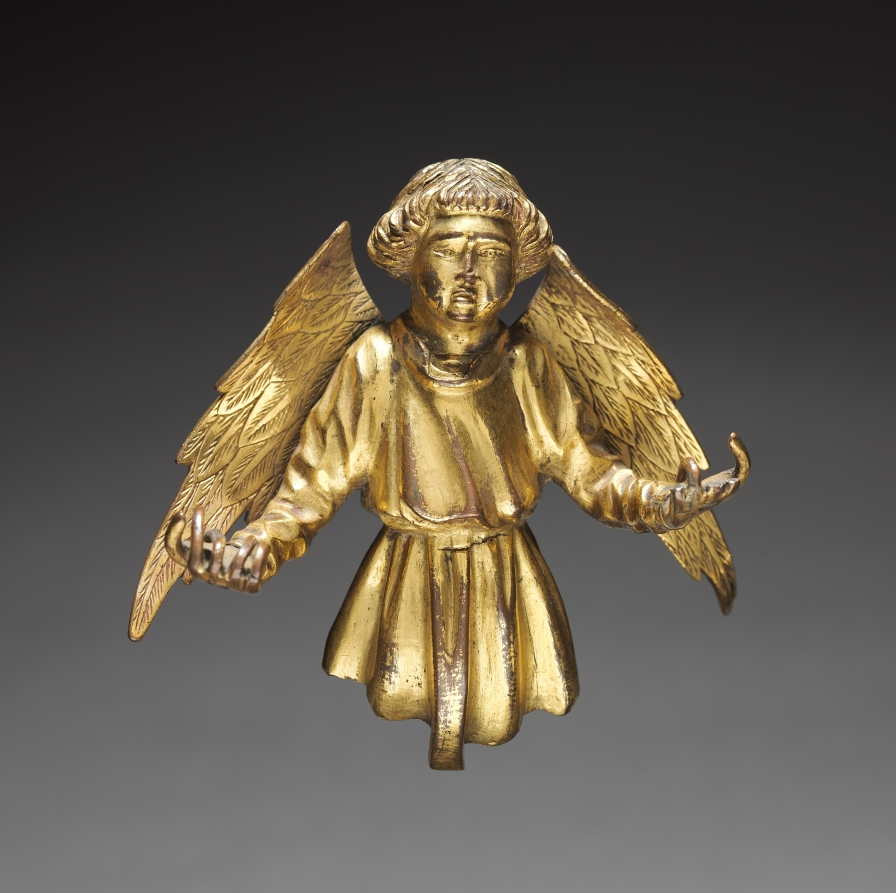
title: Angel from an Architectural Reliquary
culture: Franco-Netherlands or Paris, 15th century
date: c. 1400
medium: gilt bronze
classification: Sculpture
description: This beautiful Gothic angel is probably a surviving element from a large architectural reliquary. The last clue to its lost context disappeared when the symbolic attribute was twisted from the angel’s fingers, possibly during the destructive zeal of the French Revolution. The technique and style are characteristic of the lay workshops employed by the Valois courts during the early 1400s.